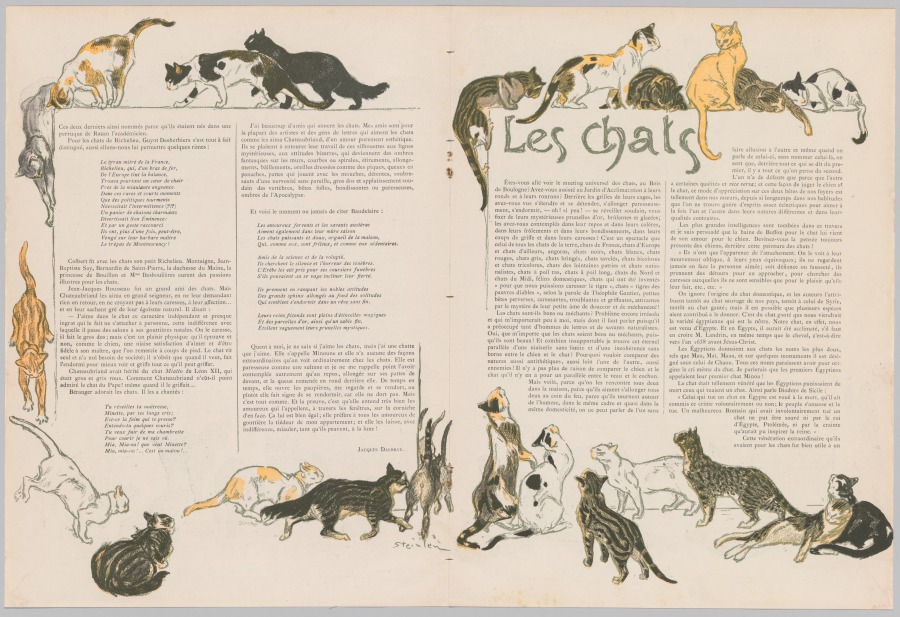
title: On Cats by Jacques Dalbray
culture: Switzerland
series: L’Illustration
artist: Théophile Alexandre Steinlen (Swiss, 1859–1923)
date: 1901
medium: Color lithograph illustration with letterpress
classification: Print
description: On this page from the March 30, 1901, issue of L’Illustration (Illustration), a French magazine, colorful depictions of cats surround a short text praising those animals and their place in history. The cats sit, sleep, and prowl around the columns of text, as if they are furnishings to climb and sleep on. Color illustrations were particularly difficult and expensive to reproduce before the advent of modern printing technology because each color had to be printed independently. As a result, artists like Théophile Alexandre Steinlen developed strategies to achieve the maximum effect by overlapping as few colors as possible, such as the yellow, gray, and black that create a variety of fur patterns here.